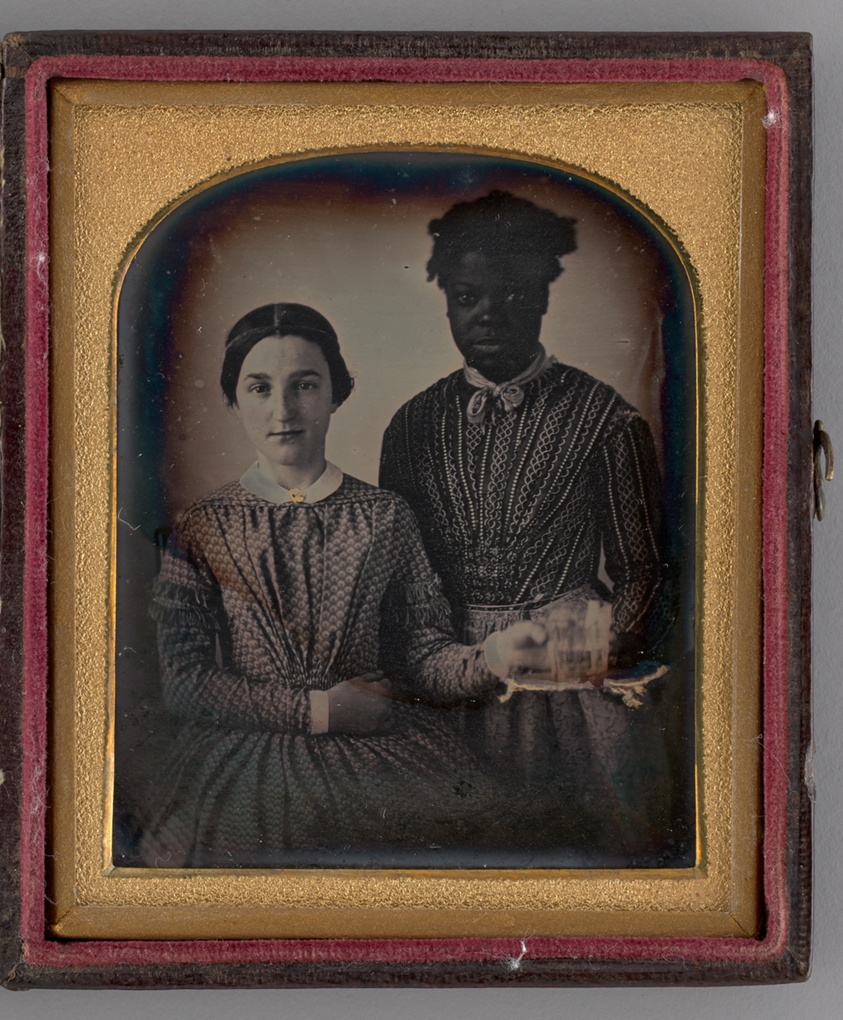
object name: Photograph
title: Untitled (Portrait of Two Women)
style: 19th century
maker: Unknown maker; American, 19th century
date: 1848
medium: Daguerreotype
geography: United States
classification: portrait; daguerreotype; photograph; photographic process; photography; portrait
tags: African American, portrait, females, women, portraits: female subject, portraits: multiple subjects, lundberg collection, portraits, portraits: African American subject